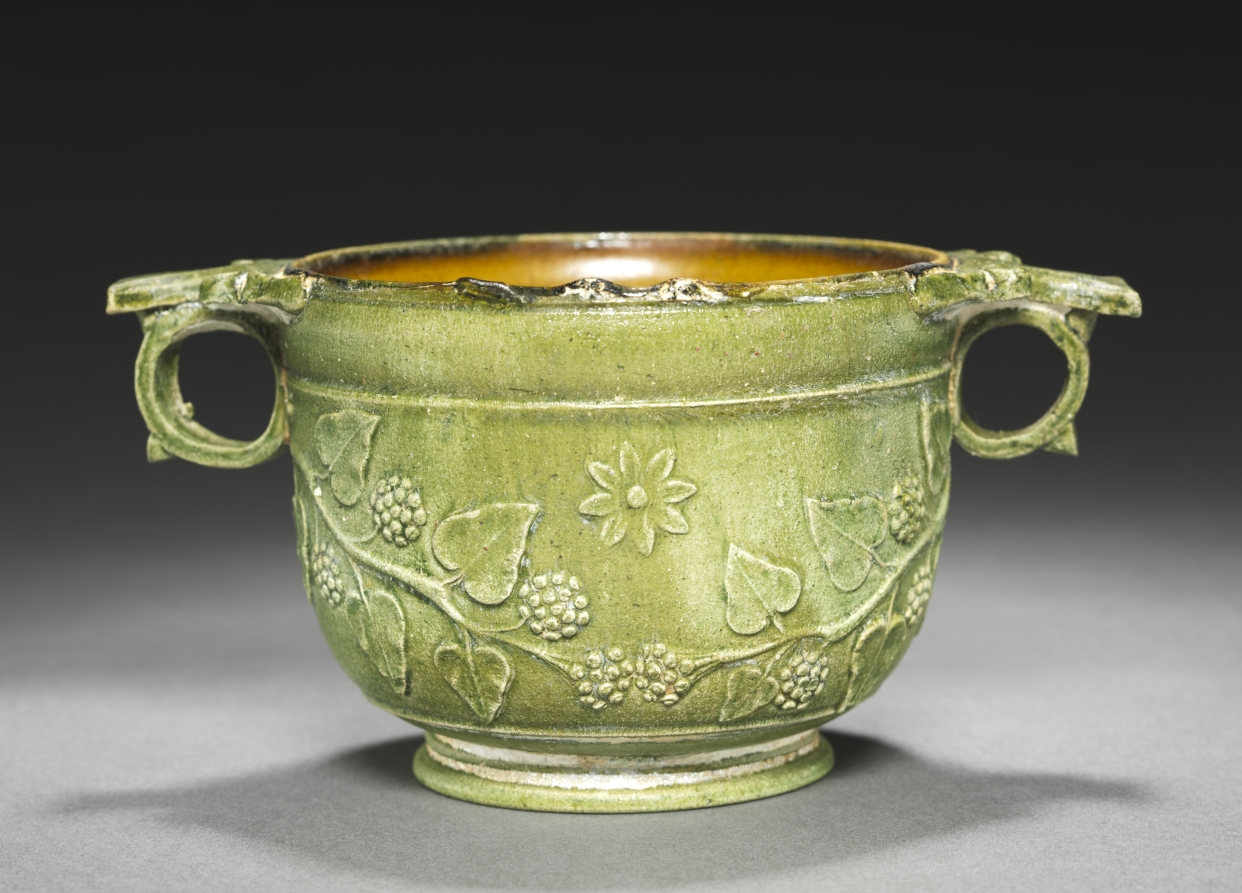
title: Skyphos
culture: probably Turkey, Roman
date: 1–100 CE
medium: earthenware with slip decoration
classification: Ceramic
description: Lead glaze was first used near the Mediterranean basin around 1000 bc, appearing in Mesopotamia and Egypt almost simultaneously. The technique flourished during the Roman Empire, and examples can be found in all reaches of the realm from England and Germany to North Africa, Syria, and Turkey, and perhaps even further east. This is a very fine example of this technique.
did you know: Lead glaze is what gives this wine cup its yellowish-green color.